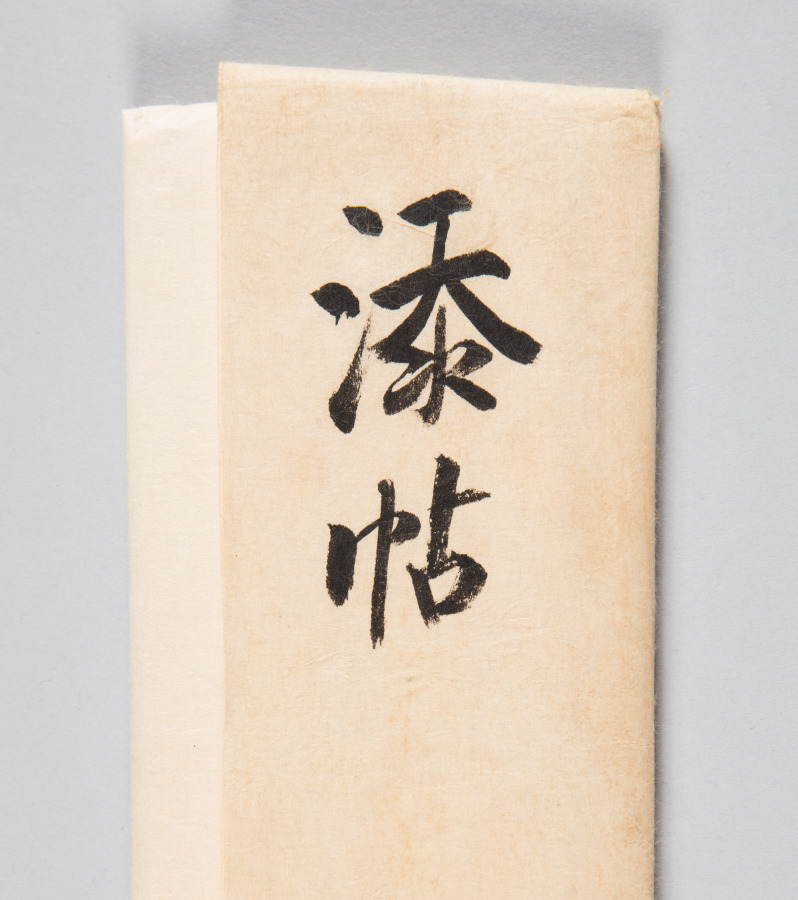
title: Reeds and Geese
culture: Japan, Kamakura period (1185–1333)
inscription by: Yishan Yining [Issan Ichinei] (Chinese, 1247–1317)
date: 1314–17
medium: hanging scroll; ink on paper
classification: Painting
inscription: signed: Issan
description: Reeds and geese has been a common pairing in Chinese literary and visual culture for many centuries. This painting presents the contribution of a Japanese amateur painter, almost certainly a Zen Buddhist monk, to Japan’s fledgling efforts to add the theme to its own cultural vocabulary in the early 1300s. As was customary at the time in Japan, the painter did not sign or seal his work; the inscription, a poem added to the painting by the eminent émigré monk Yishan Yining, along with his signature and seal, was of far greater cultural value. Today, the modestly sized painting has tremendous significance as one of the earliest surviving examples of Japanese ink paintings with reeds and geese.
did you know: Tokyo National Museum owns a copy of this painting made by Kano Gyokusen (1796–1864) when he was 14 years old.